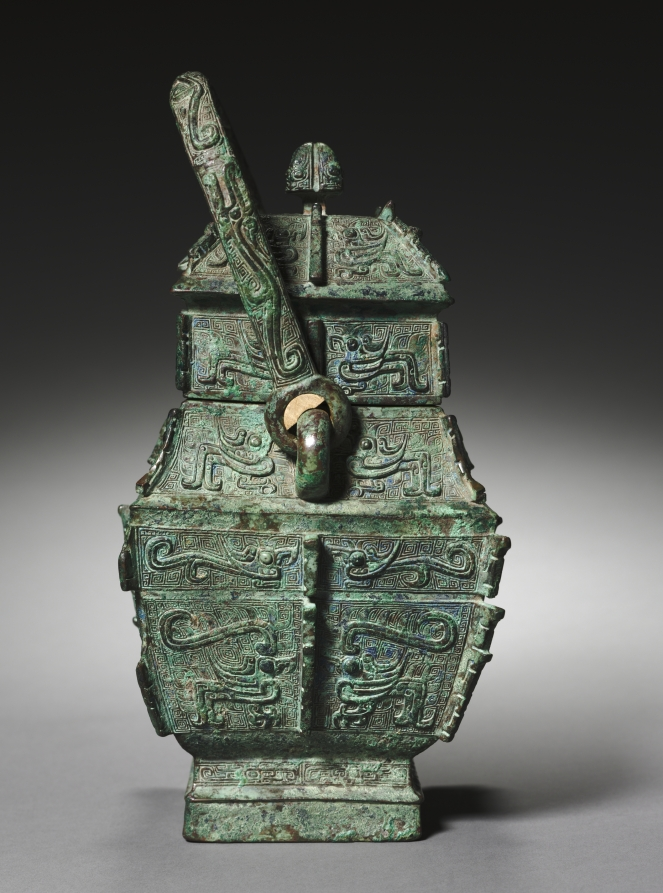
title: Square Wine Container (Fangyou)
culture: China, Henan province, probably Anyang, Shang dynasty (c. 1600–c. 1046 BCE), Anyang phase (c. 1250–1046 BCE)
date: c. 1250–1046 BCE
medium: bronze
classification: Metalwork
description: From the finely proportioned body to the elaborate decoration cast with great precision, this ritual wine vessel displays the artistic refinement and technical virtuosity that marked the full blossoming of late Shang bronze art. The dramatic contrast of the crested birds (kuifeng) against the dense background of spiral patterns (leiwen) gives the vessel a new force, clarity, and intense vitality. The distinctive square body also places it as a rare and important type among the more usual round or ovoid types.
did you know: The bird motif decoration of this bronze is uncommon; more often these bronzes are decorated with a combination of birds and dragons.